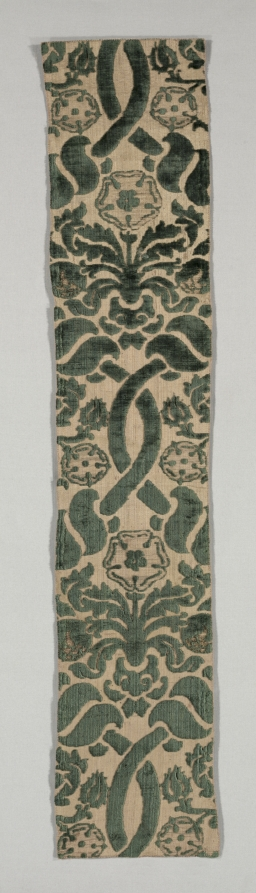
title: Fragment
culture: Italy, first half of 16th century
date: 1500–1550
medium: brocaded silk velvet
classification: Velvet